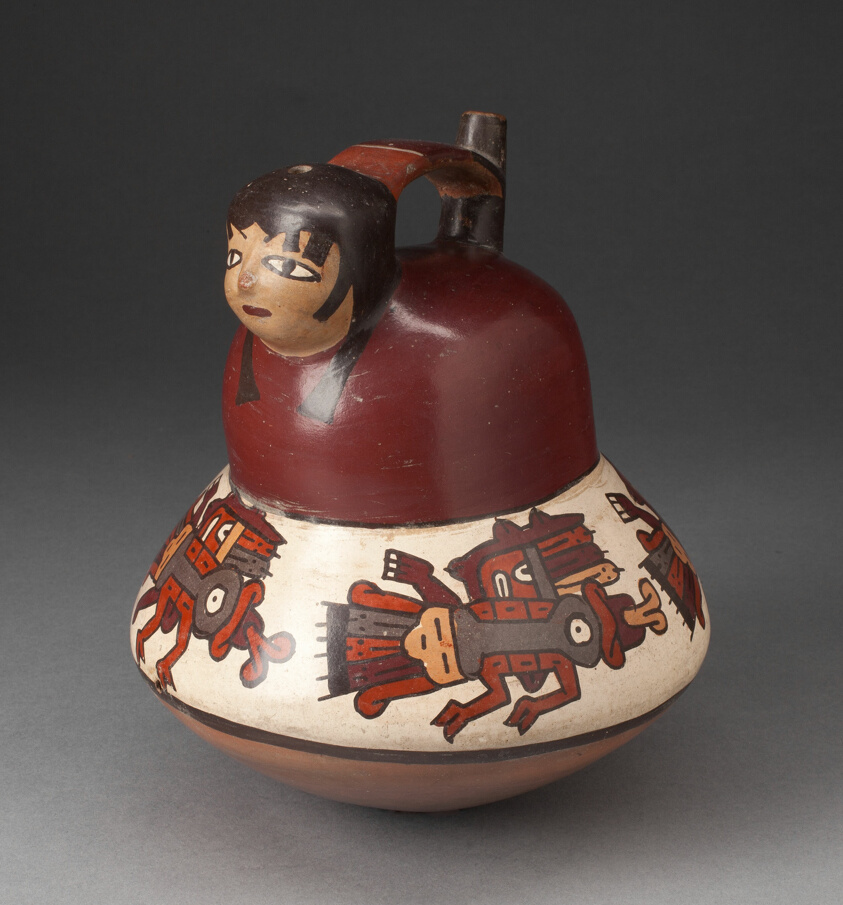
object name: Vessel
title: Vessel of a Woman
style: nazca, early intermediate period, Pre-Columbian, americas, Arts of the Americas, andean, andes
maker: Nazca; South coast, Peru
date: 350–500 CE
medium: Ceramic and pigment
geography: Peru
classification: earthenware; art of the americas; ceramics; vessel